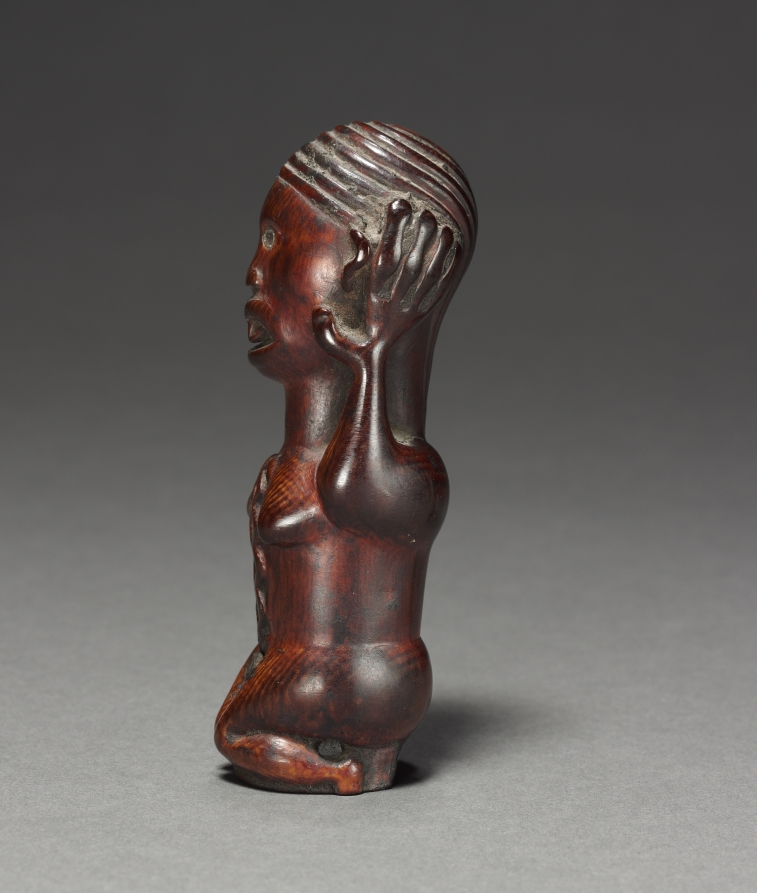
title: Female Figurine or Finial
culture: Central Africa, Democratic Republic of the Congo (most likely), Cabinda, or Republic of the Congo, Kongo people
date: late 1800s-early 1900s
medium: Ivory and iron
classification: Sculpture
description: This ivory figurine most likely served as the finial of a wooden staff or scepter, and owned and used by a high-ranking official or a ritual specialist. The combination of its features is quite unusual. The kneeling attitude is rather common and typically denotes respect. However, the position of the hands is anatomically incorrect with the thumbs toward the face. The idea of the striking hand gesture may refer to mourning.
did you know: The oversized hands with elongated fingers are positioned in an anatomically incorrect manner with the thumbs toward the face.